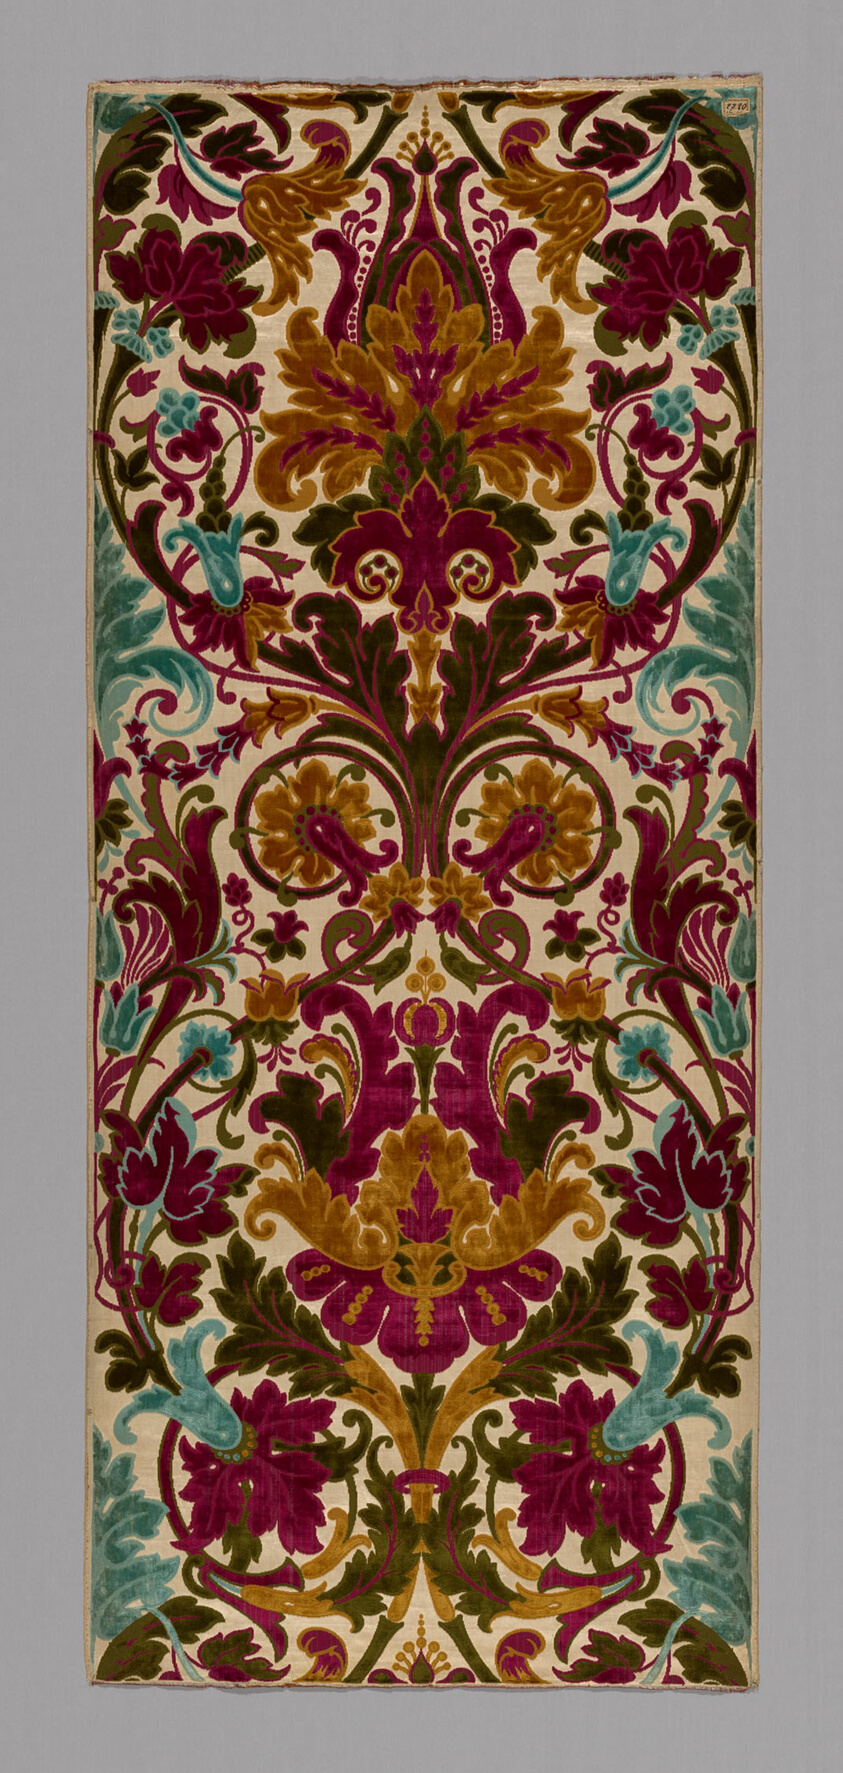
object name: Textile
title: Panel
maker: Produced by Mathevon et Bouvard, 1810–1895; France, Lyon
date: 1860/80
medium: Silk, satin weave with multi-color supplementary pile warps forming cut and uncut voided velvet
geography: Lyon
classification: textile; weaving - velvet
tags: foliage